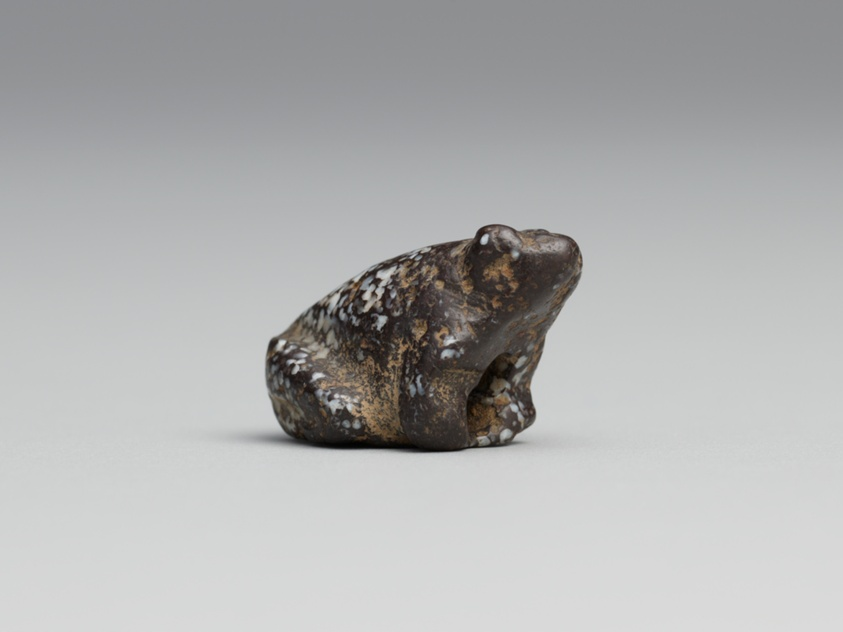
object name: Costume and Accessories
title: Amulet of a Frog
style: egyptian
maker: Egyptian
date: New Kingdom–Third Intermediate Period (about 1550–664 BCE)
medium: Stone (mottled brown white)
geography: Egypt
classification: amulet; jewelry; stone; ancient art; costume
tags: frog